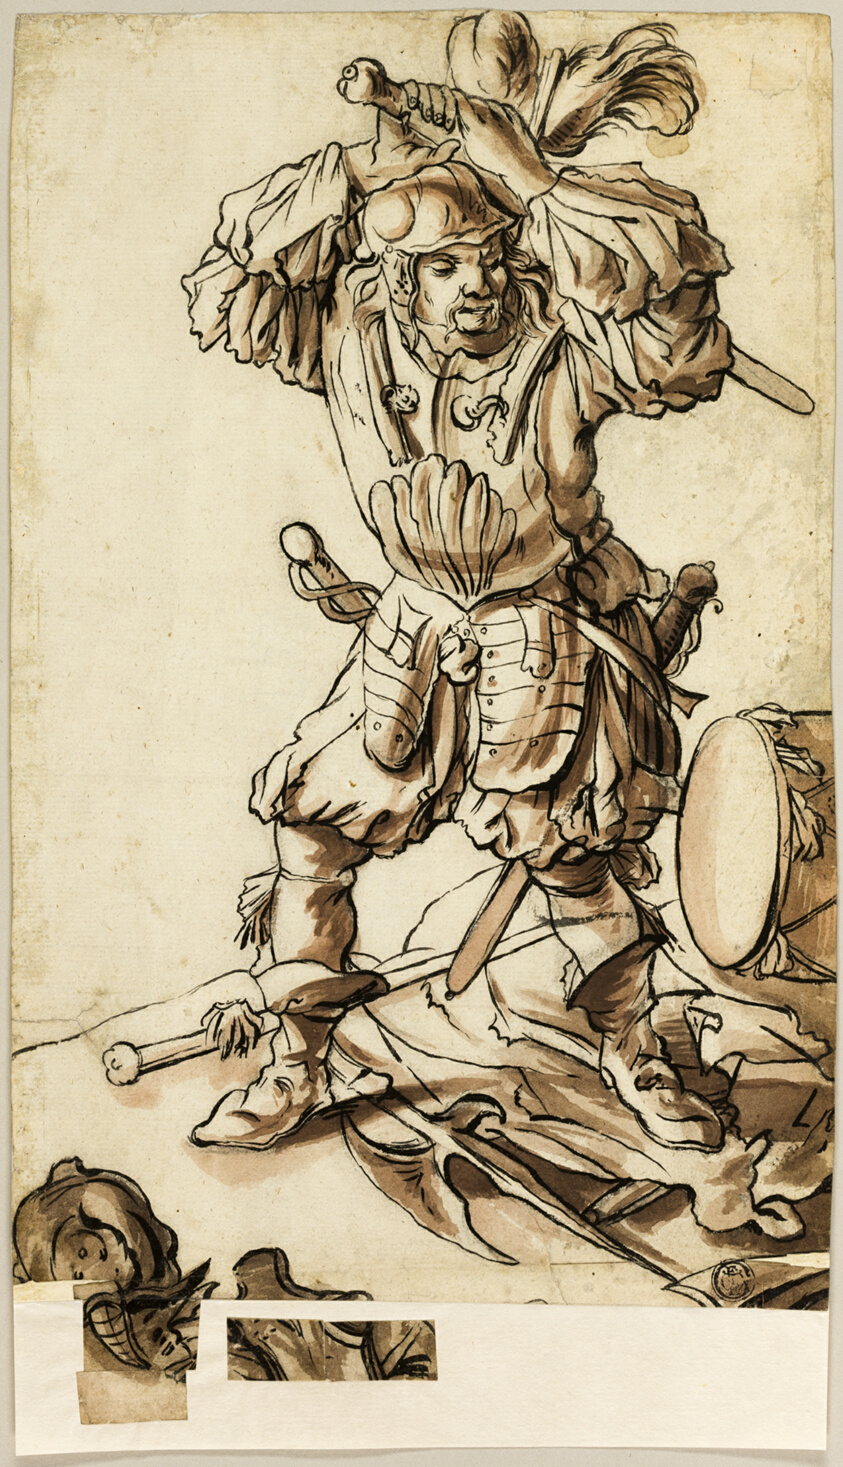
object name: Drawing and Watercolor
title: A Landsknecht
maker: Unknown Artist; Possibly Swiss, 17th century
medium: Brush and black ink, with brown wash, over black chalk, on cream laid paper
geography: Switzerland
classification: pen and ink drawings; drawings (visual works); prints and drawing